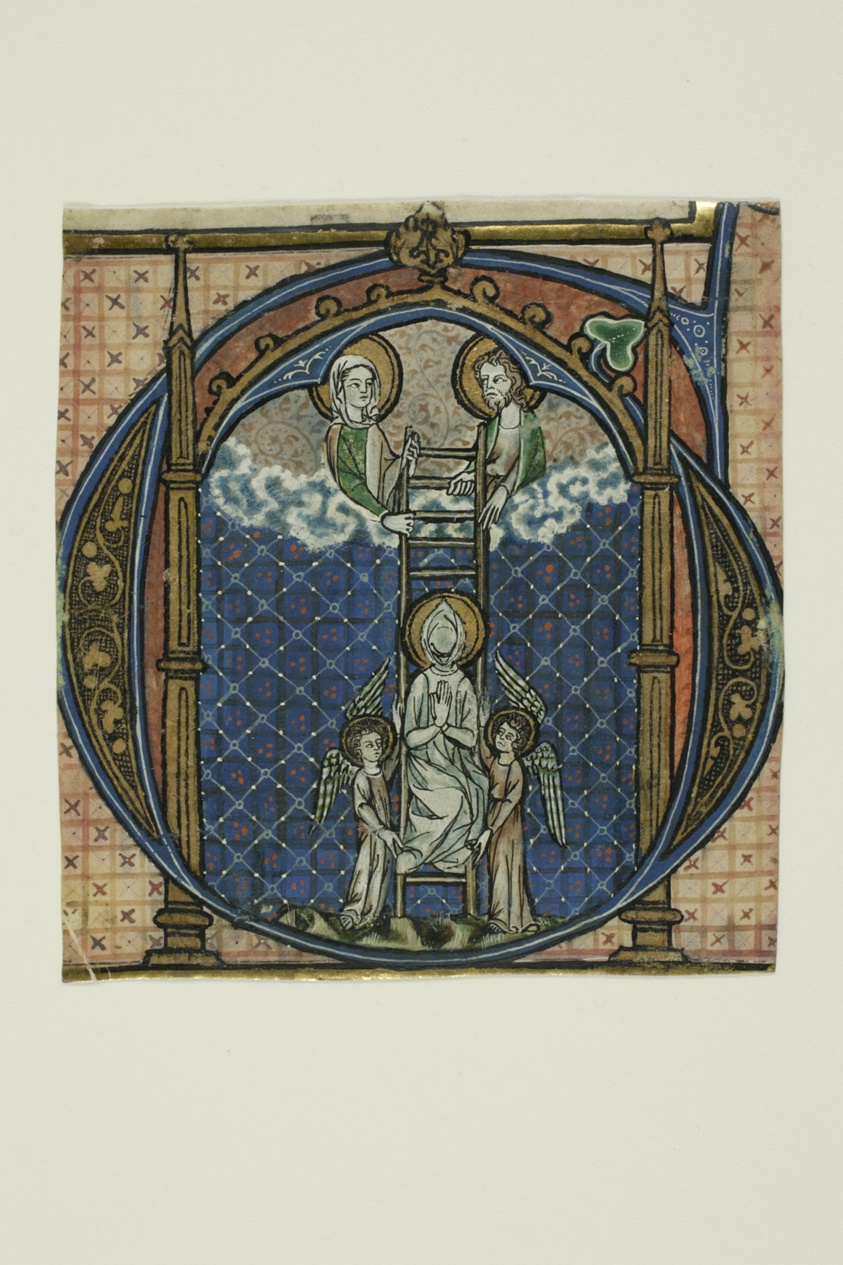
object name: Drawing and Watercolor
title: The Ascension of St. Dominic in a Historiated Initial "G" from a Gradual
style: medieval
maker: German (Cologne); follower of Johannes von Valkenburg (German, flourished 1299)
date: 1325/50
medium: Manuscript cutting with tempera and gold leaf, and gothic miniscule script inscriptions in black ink, ruled in red ink, on vellum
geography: Germany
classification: tempera; manuscript; drawings (visual works); prints and drawing